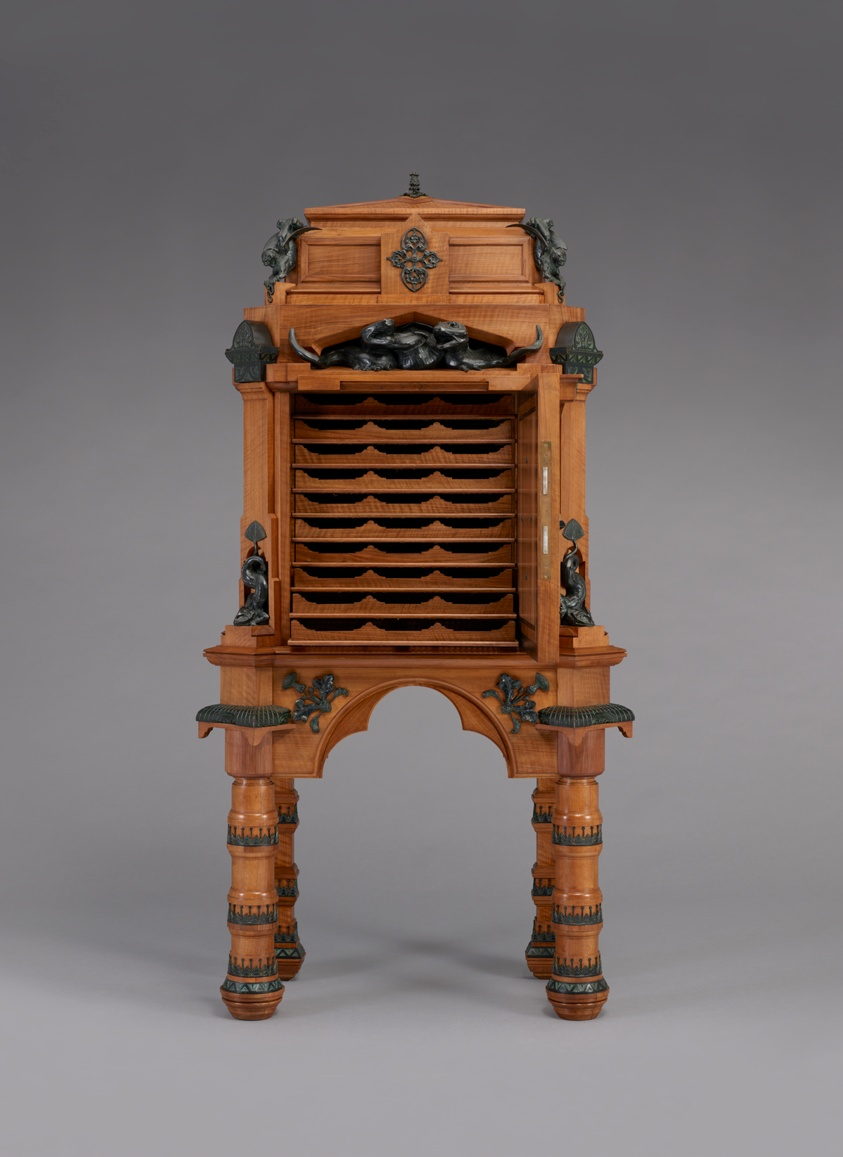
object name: Furniture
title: Cigar Cabinet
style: Neogothique, 19th century, gothic revival, merovingian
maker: Made by Charles-Guillaume Diehl (German, active in Paris, 1811–1885); Designed by Jean-Eugene Brandely (French, active 1867–1873); Bronzes modeled by Emmanuel Fremiet (French, 1824–1910); Paris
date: c. 1867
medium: Oak, cedar and walnut veneers, patinated bronze, and caning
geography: Paris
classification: furniture; humidor; european decorative arts; cabinet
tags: lizards, merovech, merovee, quatrefoil, smoking, cigars, tobacco